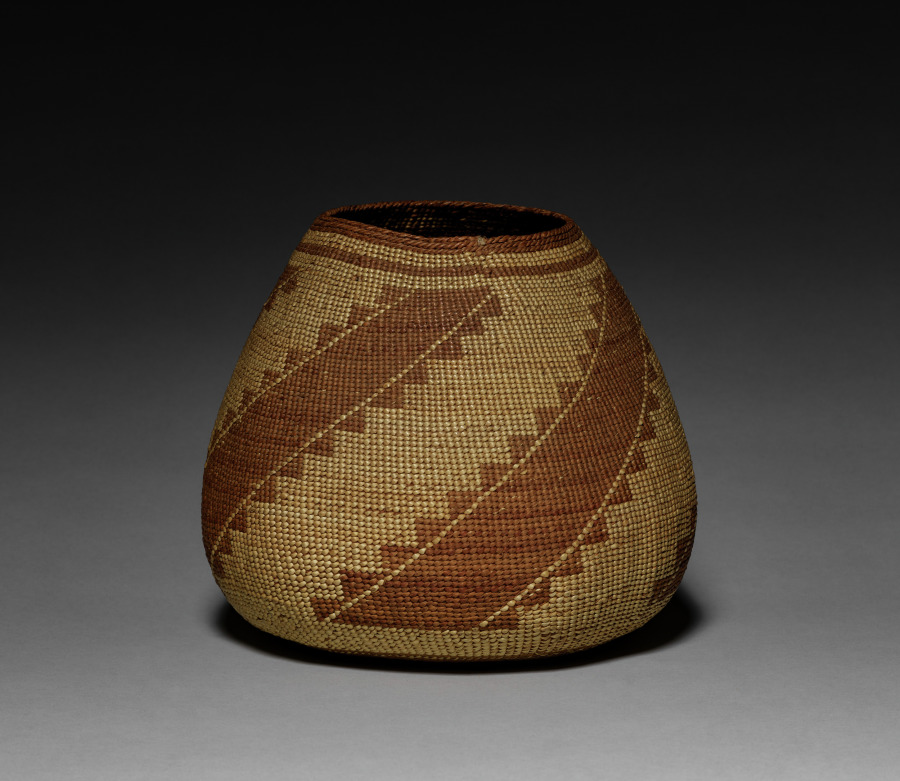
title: Tobacco Basket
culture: California, Yurok, late 19th century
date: c 1875– 1900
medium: twined grasses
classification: Basketry